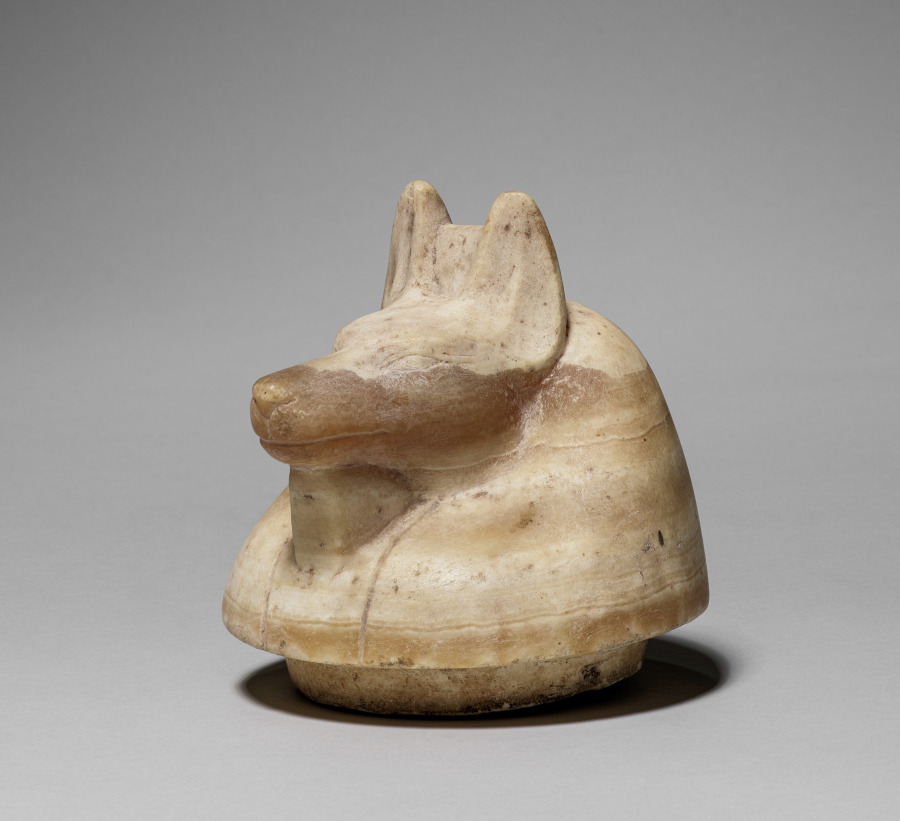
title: Canopic Jar with Jackal's Head (lid)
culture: Egypt, Late period (715–332 BCE), Dynasty 26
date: 664–525 BCE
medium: travertine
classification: Funerary Equipment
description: In the process of mummification, the liver, lungs, stomach, and intestines were removed, separately embalmed, and stored in specialized jars known as canopic jars (after a sailor in Greek mythology, who died at the town of Canopus in the Nile Delta and was worshipped there in the form of a human-headed jar). Each organ was identified with one of four funerary deities collectively known as the Sons of Horus: the liver with Imsety (man's head), the lungs with Hapy (baboon's head), the stomach with Duamutef (jackal's head), and the intestines with Qebehsenuef (falcon's head). It was their duty to protect the deceased and restore to him his body parts in the hereafter.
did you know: This jar is made of travertine stone-- subtle in color and with a captivating natural pattern-- with hieroglyphics carved on the front. Such jars were used to hold internal organs of the deceased and to preserve them for the afterlife.